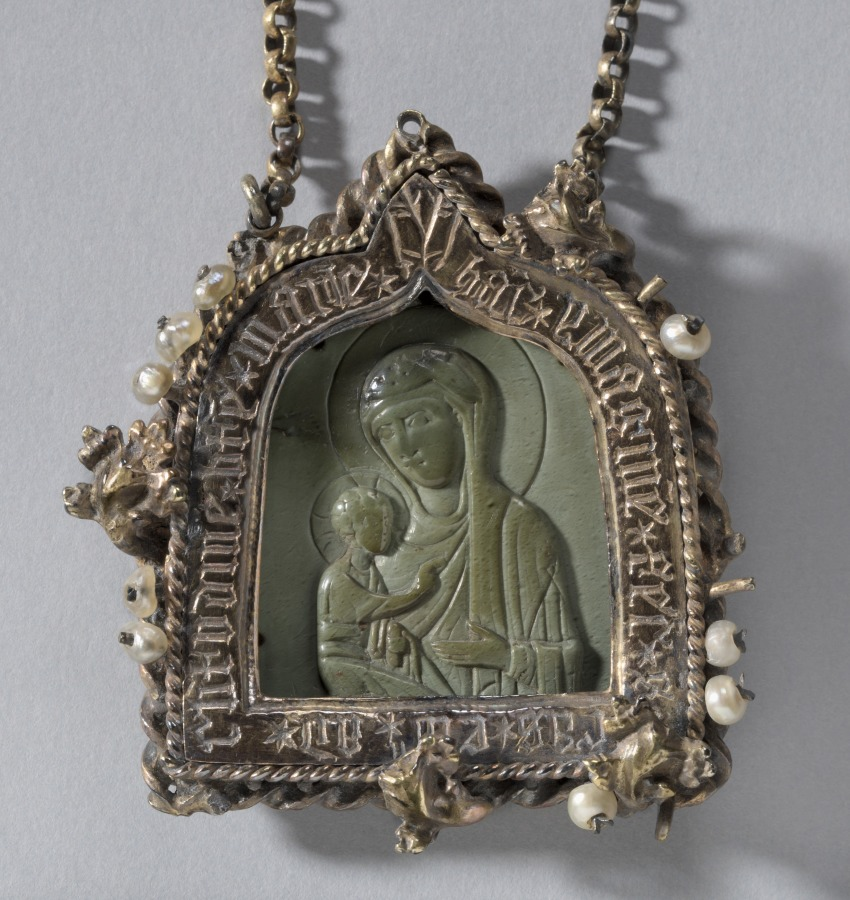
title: Pendant Icon with the Virgin "Dexiokratousa" and Frame with Winged Bull of Saint Luke on the back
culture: Byzantium (pendant); Germany, Aachen (frame), Byzantine period, 12th century (pendant); Byzantine period, 14th century (frame)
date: pendant 1100s; frame mid-1300s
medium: steatite, gilt silver, pearls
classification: Glyptic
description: This small-scale Byzantine icon depicts a half-length figure of the Virgin holding the Christ child. When the icon was mounted in its present frame by a German artist in the 14th century, it was considered to be an authentic portrait painted by Saint Luke. This claim, made in an inscription on the frame, is further emphasized by the ox, Saint Luke’s symbol, engraved on the frame’s reverse.